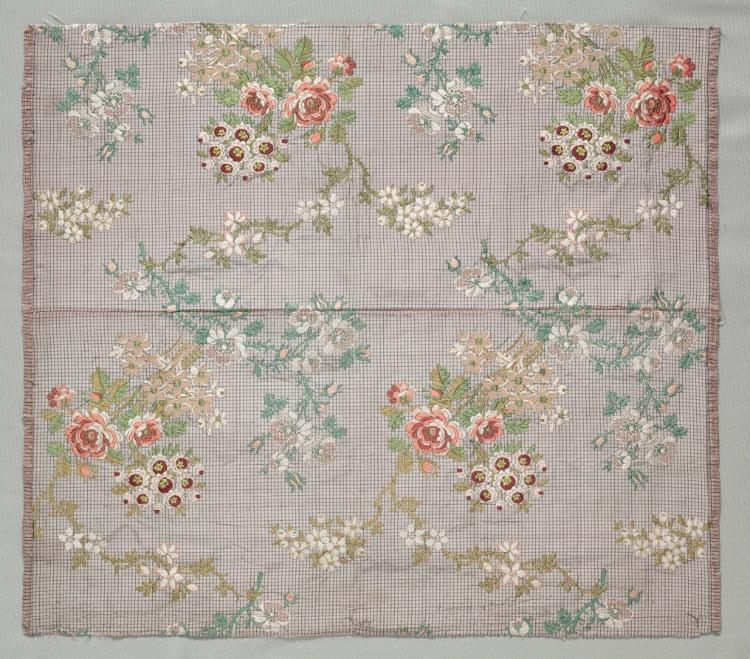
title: Brocade on Tabby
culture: France, mid-18th century, Period of Louis XV (1723-1774)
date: mid 1700s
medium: brocade on tabby; silk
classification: Textile